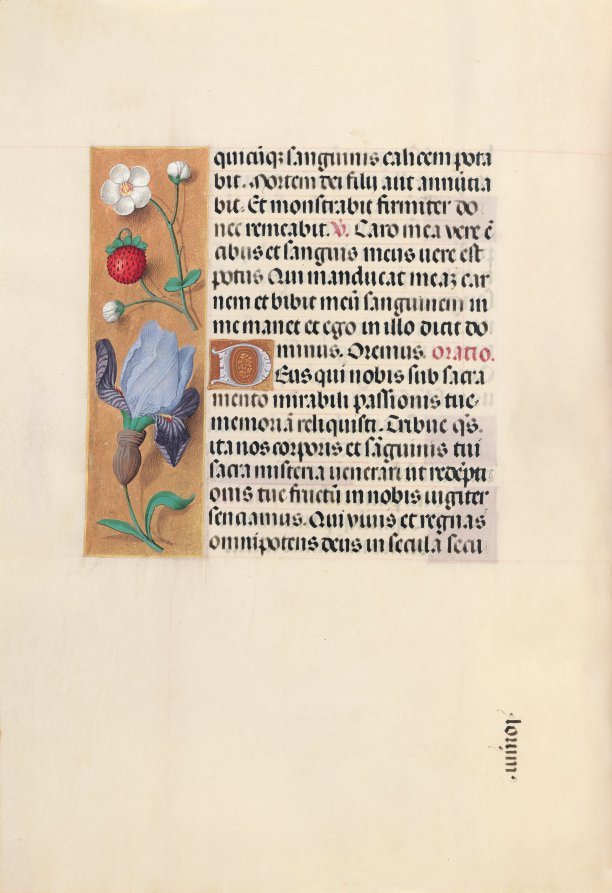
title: Hours of Queen Isabella the Catholic, Queen of Spain: Fol. 46v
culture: Flanders, Ghent and Bruges, late 15th century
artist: Master of the First Prayerbook of Maximillian (Flemish, c. 1444–1519)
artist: and Associates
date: c. 1500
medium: ink, tempera, and gold on vellum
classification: Bound Volume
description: This manuscript was illuminated by a circle of at least five highly organized manuscript painters active in the Flemish cities of Ghent and Bruges. The principal illuminator was Alexander Bening, who painted the majority of the book's miniatures. Manuscripts produced by this circle of artists are renowned for the decoration of their borders, which typically feature a rich variety of realistically-painted flowers, birds, and butterflies. This prayer book, called a book of hours, was intended not for a cleric, but for the private devotions of a lay person-in this case, Isabella the Catholic, Queen of Spain (1451-1504). Isabella's coat of arms embellishes the book's frontispiece. It is unlikely that the book was commissioned by the Queen herself; rather, she probably received it as a diplomatic gift from someone courting her patronage, perhaps Cardinal Francisco Jimenez de Cisneros. A Franciscan friar, Jimenez was dependent upon Isabella for his advancement, first to the post of Queen's confessor in 1492, and then to Archbishop of Toledo in 1495.